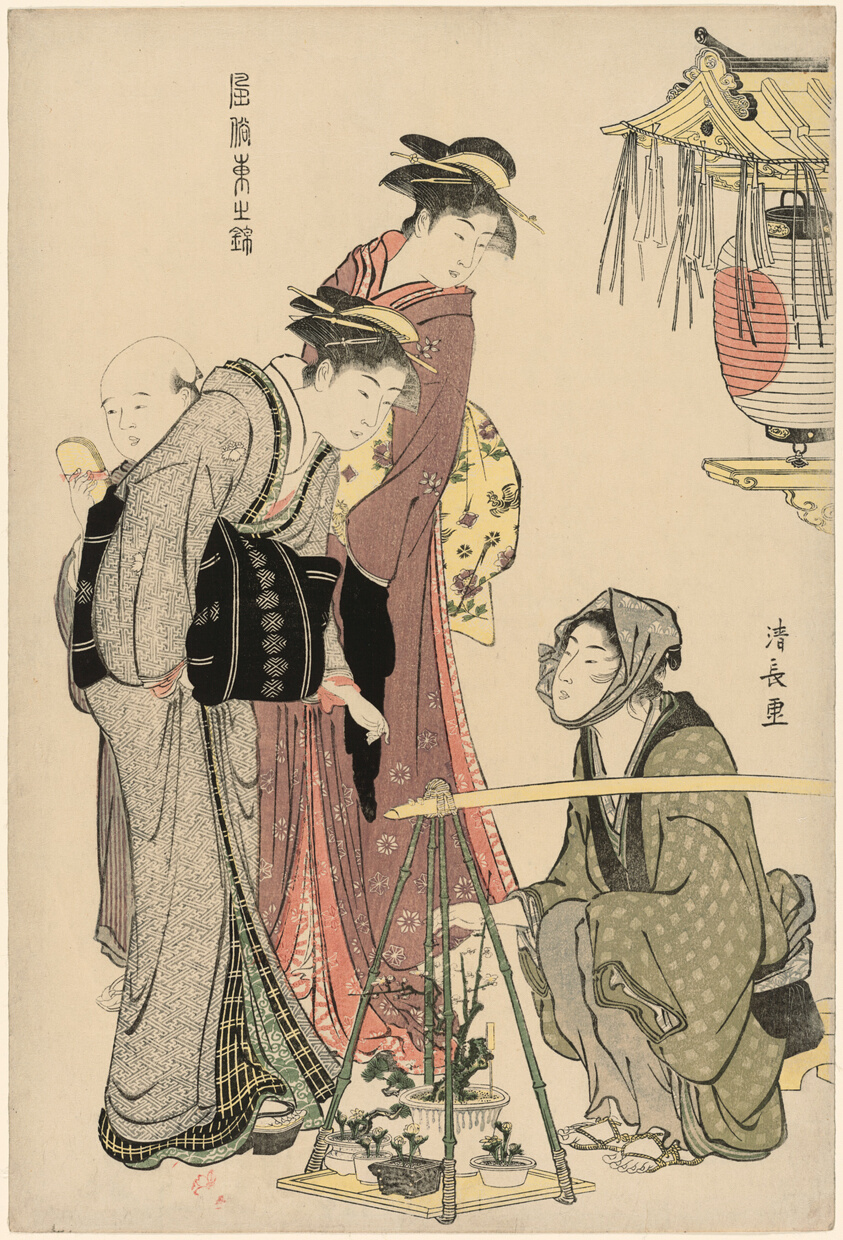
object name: Print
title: Buying Potted Plants, from the series "A Brocade of Eastern Manners (Fuzoku Azuma no nishiki)"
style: Japanese (culture or style)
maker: Torii Kiyonaga (Japanese, 1752-1815)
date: c. 1783/84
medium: Color woodblock print; oban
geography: Japan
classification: woodblock print; print; asian art